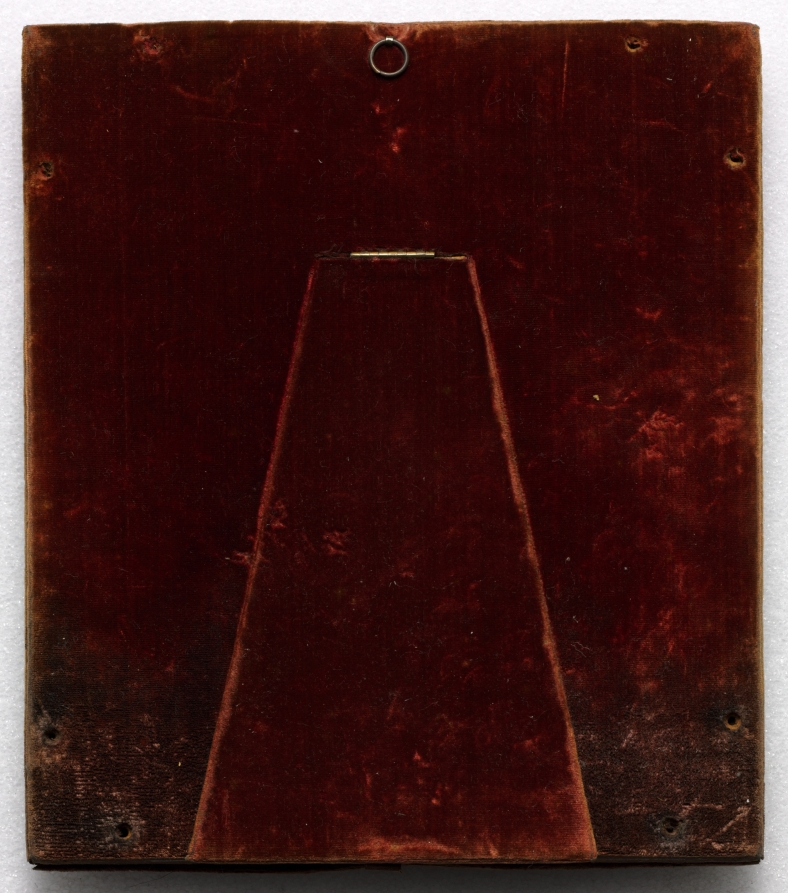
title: Portrait of Anne Law (née Towry), 1st Lady Ellenborough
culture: England, 19th century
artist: John Linnell (British, 1792–1882)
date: c. 1821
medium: watercolor on ivory heightened with gum arabic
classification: Portrait Miniature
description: John Linnell was born and lived much of his young adulthood in Bloomsbury, where his father, James, made picture frames and restored paintings. As a boy the artist trained briefly with Benjamin West (1738–1820) and John Varley (1778–1842) before becoming a student at the Royal Academy from 1805 to 1812. Though primarily known for his landscapes, Linnell was also a prolific portraitist and executed miniatures during the first two decades of his career, learning the medium from his neighbor James Holmes (1770–1860). According to an early biographer, Linnell began painting miniatures around 1818 with a portrait of his wife. By 1823 he had executed a number of miniature commissions from aristocratic patrons, including Princess Sophia, facilitated by the praise of the society maven Lady Stafford. He painted his last known miniature on ivory in 1832. During the approximately fifteen years that the artist painted miniatures, he consistently charged between 10 and 50 guineas for a portrait. These fees corresponded less to the size of the ivory than to the degree of finish and elaboration of the composition. In this portrait Anne Law (née Towry), 1st Lady Ellenborough (c. 1769–1843), is depicted half length. She wears a high-waisted white dress of translucent fabric through which a hint of blue appears and around which she wears a black belt. A devant de corsage (stomacher, or bodice brooch) is worn at her décolletage, extending to the belt. Its gold framework contains at least twelve semiprecious stones colored blue, red, aquamarine, pink, and brown. A gold brooch with a large blue stone is pinned to the cloak at her right shoulder. She also wears a twisted multistrand pearl necklace, matching pearl pendant earrings, and two gold rings on her left ring finger. A dark gray-green shawl with red reverse, gold border, and red fringe is draped over her shoulders and arms. She holds a closed fan in her left hand and stands against a brown background featuring a green and auburn striped curtain in the upper left corner. The sitter’s fair hair is dressed in ringlets that fall at her neck. The miniature is housed in a standing gilt metal and red velvet frame that dates from the same period.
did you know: Lady Ellenborough was described as “so exceedingly lovely, that passengers would linger to watch her watering the flowers—such was the fashion of the day—on the balcony of their house in Bloomsbury Square.”